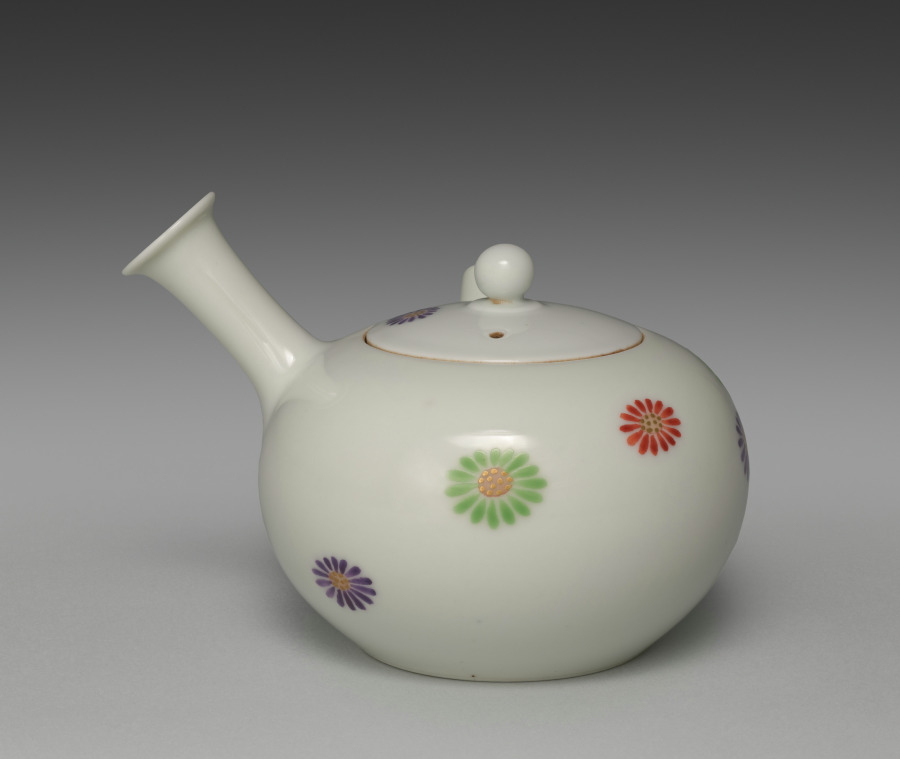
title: Teapot with Chrysanthemum Motifs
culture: Japan, Meiji period (1868–1912)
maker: Seifū Yohei III (Japanese, 1851–1914)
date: 1912–14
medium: Porcelain with overglaze color enamel and gold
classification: Ceramic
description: This side-handled sencha teapot has the lid flush against the body, forming an oblong orb. It is decorated with a sprinkling of similar chrysanthemum motifs in red, green, and purple overglaze color enamels with centers of pale red dotted with gold.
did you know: This teapot with chrysanthemum motifs shows off Seifū Yohei III’s technique of enamels painted over the glaze.